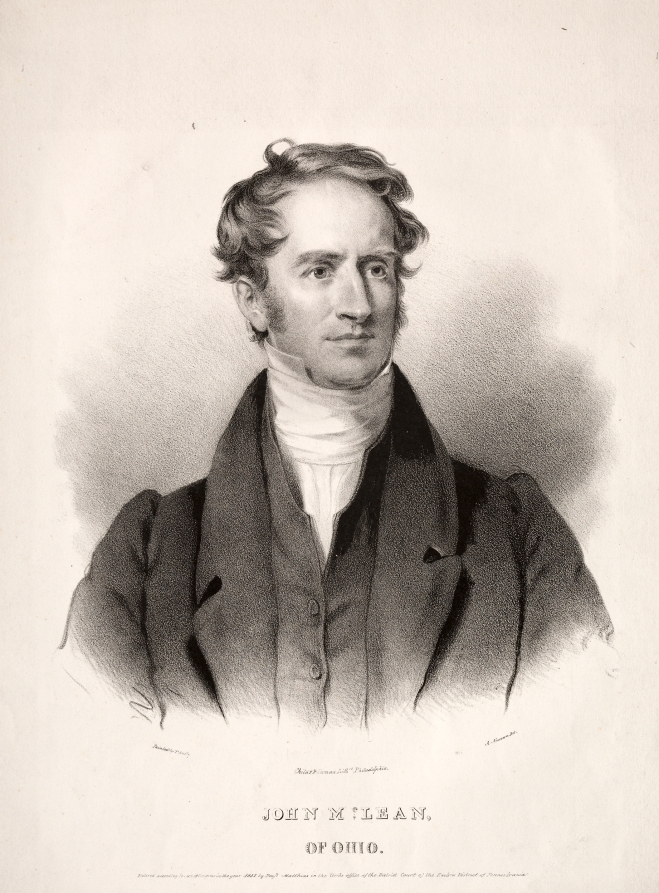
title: John McLean of Ohio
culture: America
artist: Albert Newsam (American, 1809–1864)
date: 1832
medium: lithograph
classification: Print